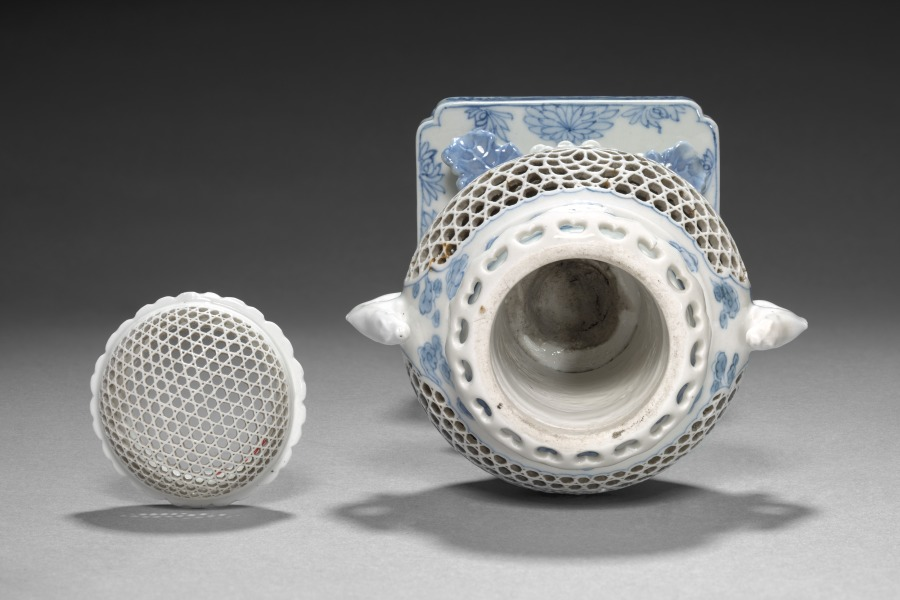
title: Chrysanthemum Censer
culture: Japan, Edo period (1615–1868)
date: 1700s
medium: Porcelain with underglaze blue (Hirado ware)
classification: Ceramic